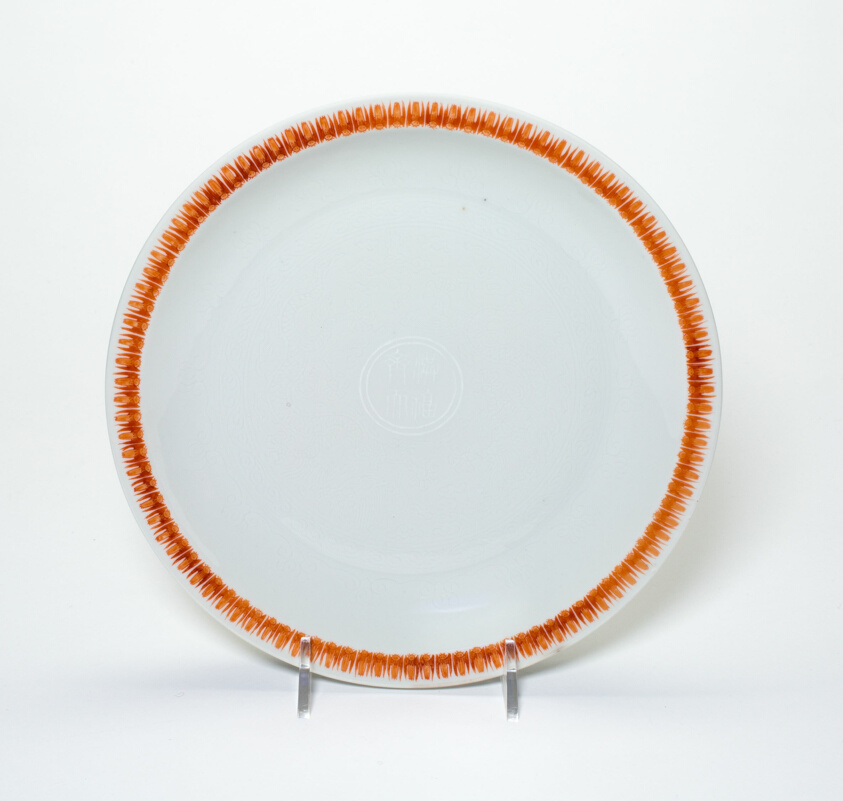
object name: Vessel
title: Plate with Bats and Dragons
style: Chinese (culture or style)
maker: China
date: Qing dynasty (1644–1911), Kangxi reign mark and period (1662–1722)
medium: Porcelain painted in underglaze iron red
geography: China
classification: plate (general, dish); porcelain; dish (vessel); ceramics; asian art; vessel